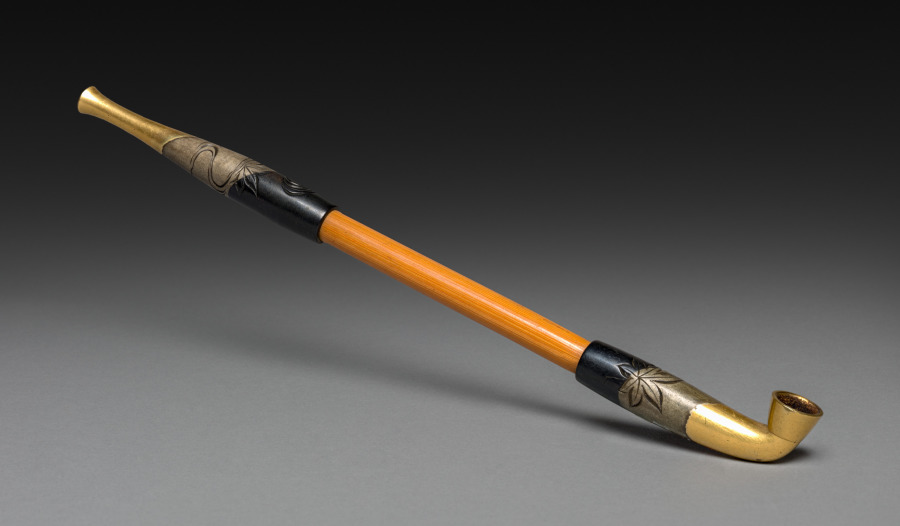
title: Tobacco Pipe with Maple Leaves in a River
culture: Japan, Edo period (1615–1868)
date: early to mid-1800s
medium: bamboo, metal, brass, pewter (?), and iron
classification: Miscellaneous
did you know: A famous Japanese poem describes the Tatsuta River dyed in crimson, a reference to autumn maple leaves floating on its surface, and a likely source for the imagery on this pipe.